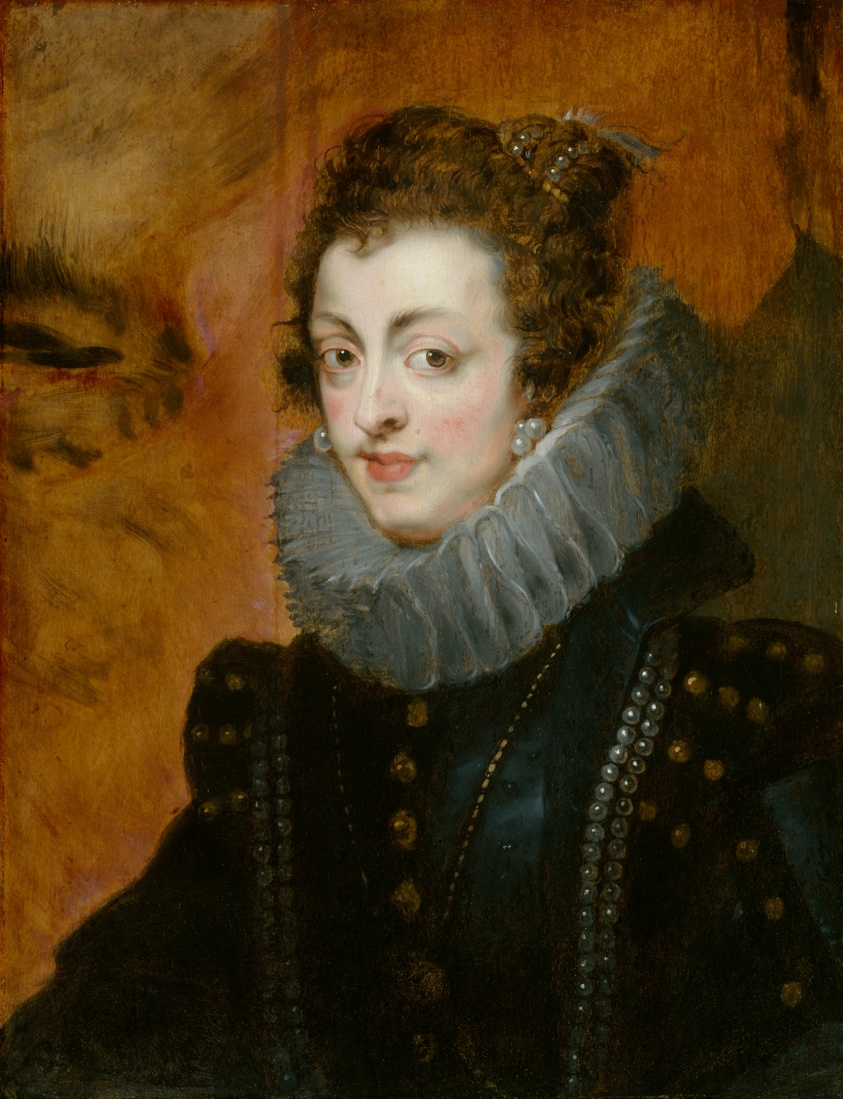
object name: Painting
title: Portrait of Isabella of Bourbon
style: 17th Century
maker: Follower of Peter Paul Rubens (Flemish, 1577–1640)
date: c. 1630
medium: Oil on panel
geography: Flanders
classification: painting; flemish; paint; oil paintings (visual works); oil on panel; portrait; european painting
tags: portraits: female subject, woman, wealth, royalty, royal, portraits, portrait, pearls, orange (color), nobility, luxury, jewelry, dresses, black (color)